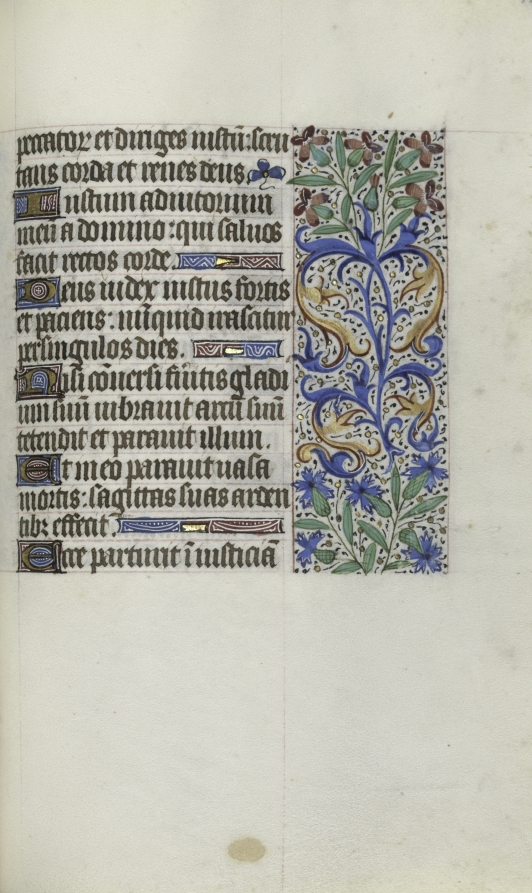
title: Book of Hours (Use of Rouen): fol. 114r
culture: France, Rouen, 15th century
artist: Master of the Geneva Latini (French, active Rouen, 1460–80)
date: c. 1470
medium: ink, tempera, and gold on vellum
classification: Bound Volume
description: In the late 1400s and early 1500s Rouen was an established and important center of book production. The city’s cathedral had a wealthy chapter that spent large sums of money to commission books and to maintain its extensive library. The stationers and booksellers would have likely been concentrated in or near the cathedral precinct. This artist, named after a manuscript now in Geneva, was Rouen’s principal illuminator during the second half of the 1400s.